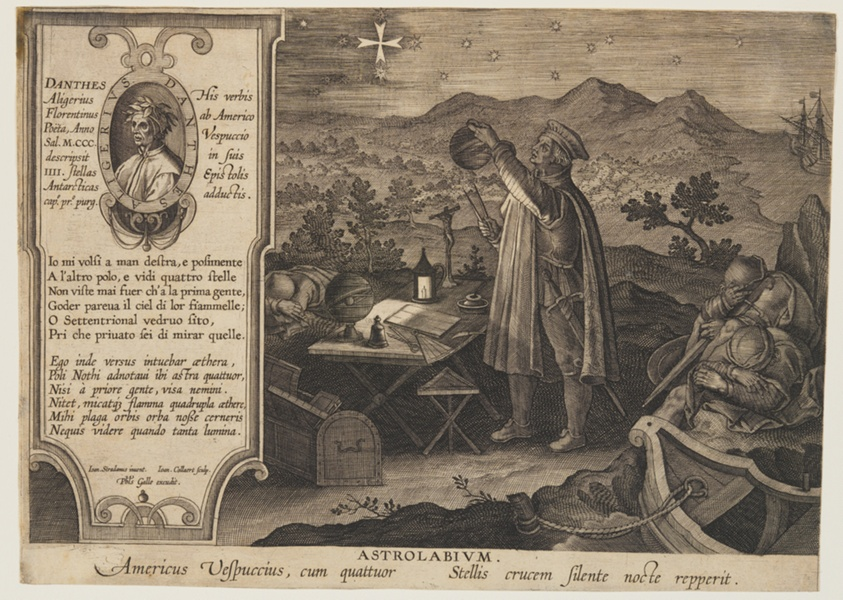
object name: Print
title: The Astrolabe - Amerigo Vespucci, from Nova Reperta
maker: Hans Collaert (Flemish, 1566–1628); after Jan van der Straet (Flemish, 1523–1605)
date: c. 1580-1600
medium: Engraving on ivory laid paper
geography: Flanders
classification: print; paper; prints and drawing; engraving